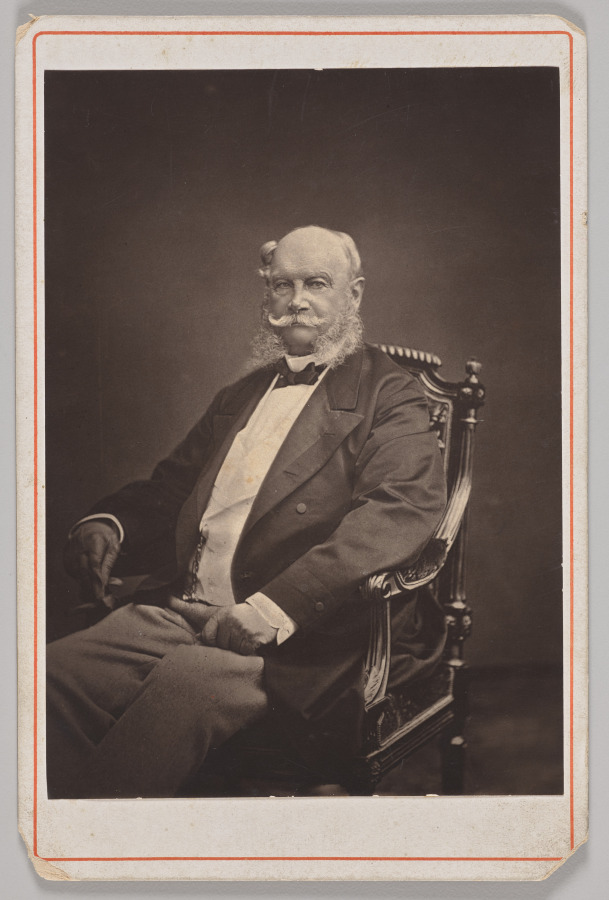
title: Wilhelm I, King of Prussia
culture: Germany, 19th century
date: 1870s–88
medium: albumen print, cabinet card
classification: Photograph